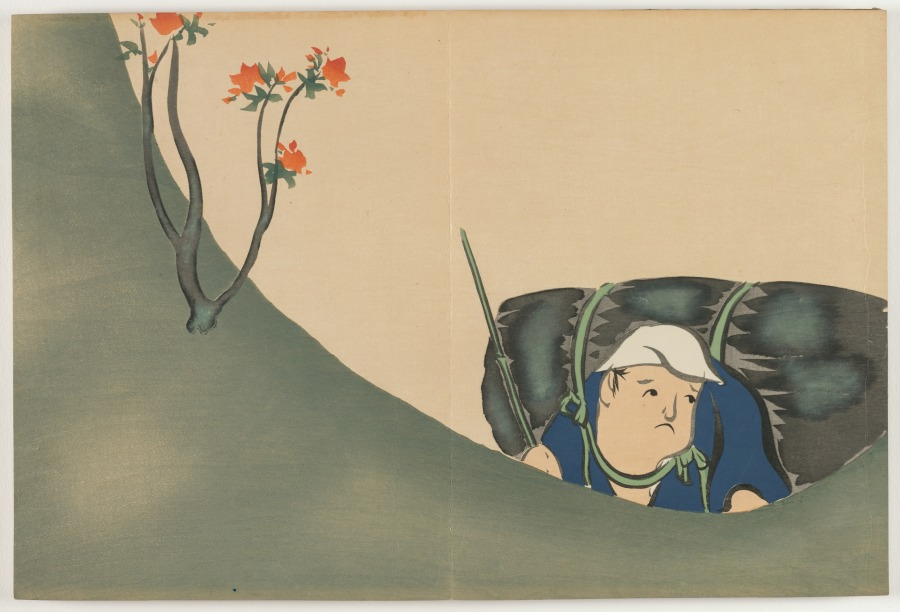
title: Flowers of a Hundred Worlds (Momoyogusa): Woodcutter (Shomu)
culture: Japan, Meiji period (1868–1912)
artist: Kamisaka Sekka (Japanese, 1866–1942)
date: 1910–11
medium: color woodcuts with gold and silver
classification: Bound Volume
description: This print from a set of three woodblock printed albums displays the graphic design prowess of Kamisaka Sekka. The images were first distributed one by one to subscribers to the series but later were reissued in bound form, like this book, for mass consumers. Each print features a vignette taken from nature or Japanese literature. Many of the scenes have a long history in Japan, originating in the 900s or 1000s and having been interpreted by all manner of artists since that time. Sekka’s selections hew closely to precedents from the Rinpa style originated by painter Tawaraya Sōtatsu (c. 1570–c. 1640) and calligrapher Hon’ami Kōetsu (1558–1637).